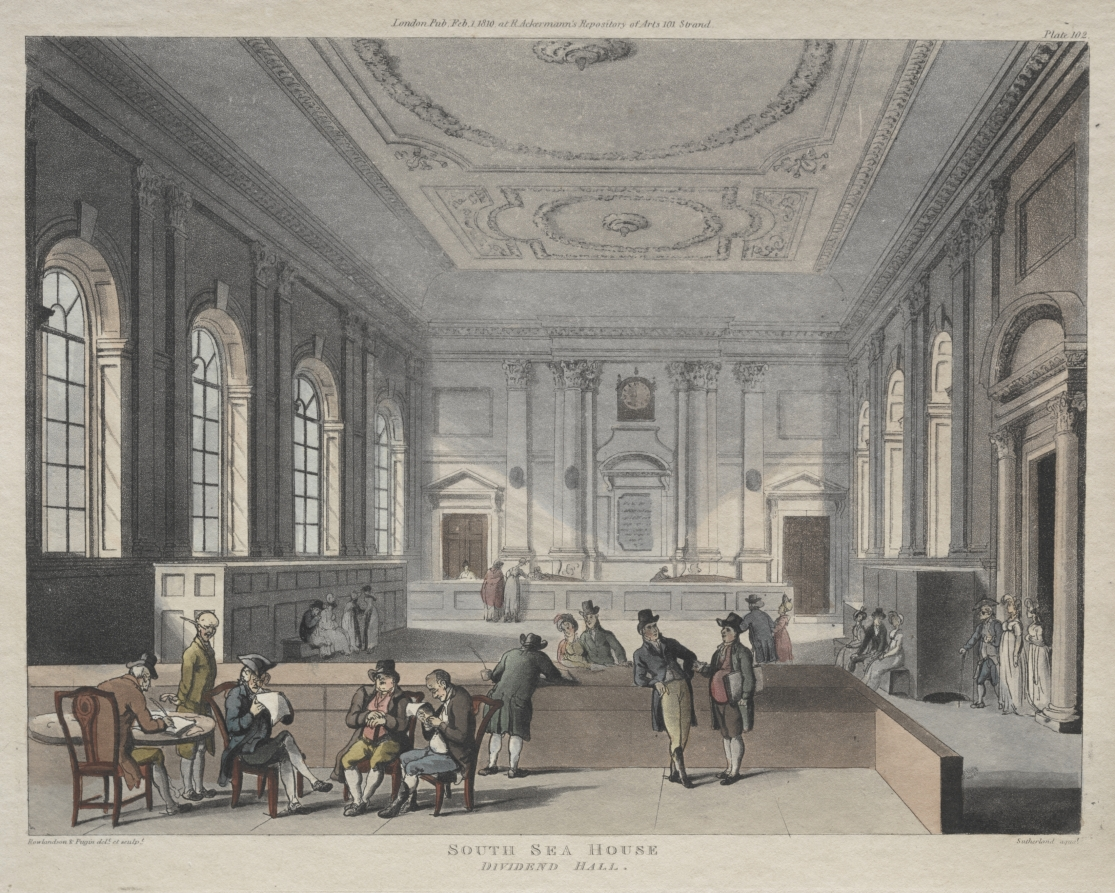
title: South Sea House, Dividend Hall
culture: England, 19th century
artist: Thomas Rowlandson (British, 1756–1827)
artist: and Augustus Charles Pugin (British, 1762–1832)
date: 1810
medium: etching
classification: Print